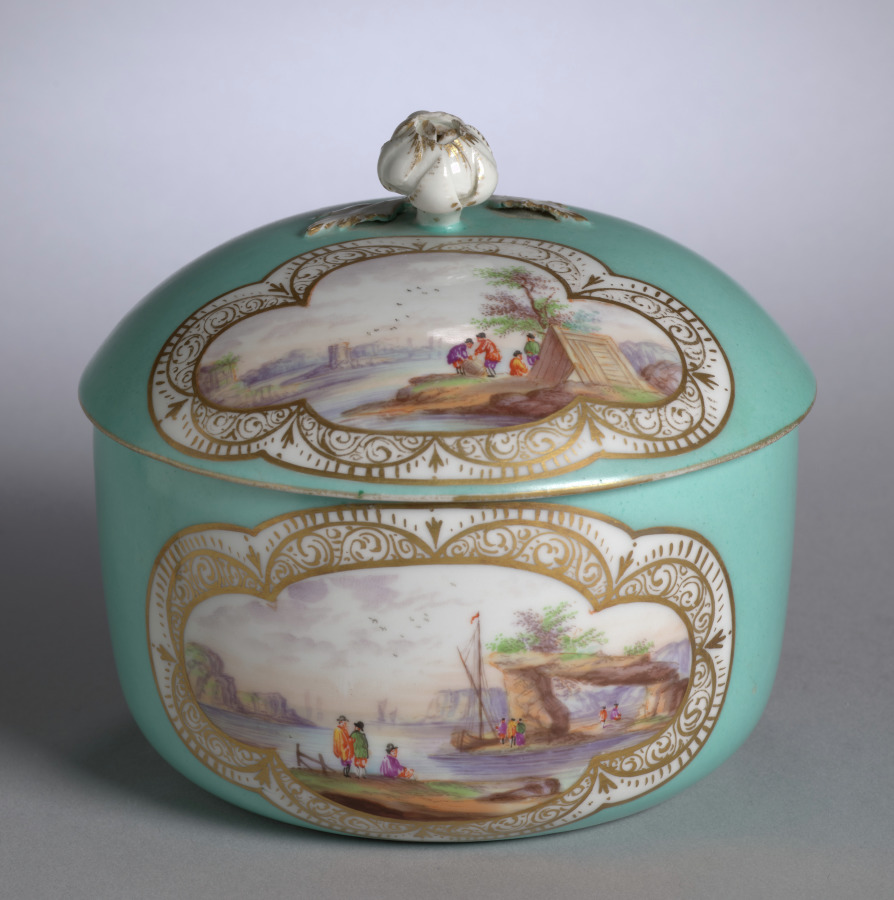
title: Sugar Bowl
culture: Germany, Meissen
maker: Meissen Porcelain Factory (German, est. c. 1710)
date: c. 1750–70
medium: porcelain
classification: Ceramic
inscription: Half moon mark on the bottom.